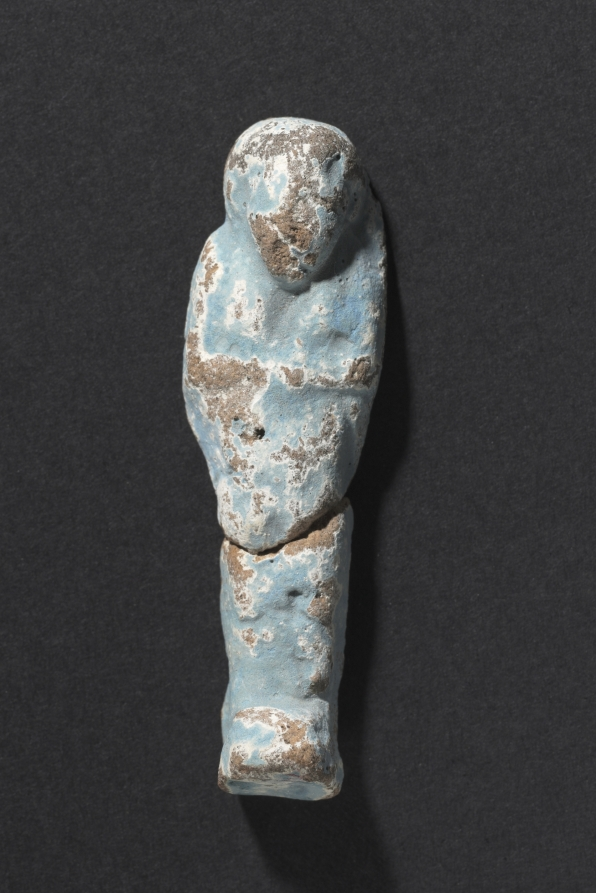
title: Shawabty of Ditamenpaankh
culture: Egypt, Late period (715–332 BCE), Dynasty 25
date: 715–656 BCE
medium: terracotta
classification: Funerary Equipment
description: High demand for shawabtys in the Late Period, a time when as many as 400 or more shawabtys were placed in the tomb with the deceased, gave rise to a specialized container for storing them: the shawabty box. This example is inscribed for the lady of the house, Ditamenpaankh, and was probably one of a pair originally made for her. The single-masted boat on the box's lid is perhaps an allusion to the pilgrimage of the deceased to the holy city of Abydos, the cult city of Osiris, king of the dead. The shawabtys inside are crude, mass-produced examples cast in an open mold. Made of terracotta, their blue paint imitates more costly shawabtys made of faience. As for the shawabty spell, it has been removed from its traditional location on the shawabty's front and relocated onto the sides of box, where it needed only to be written once, thus expediting production.